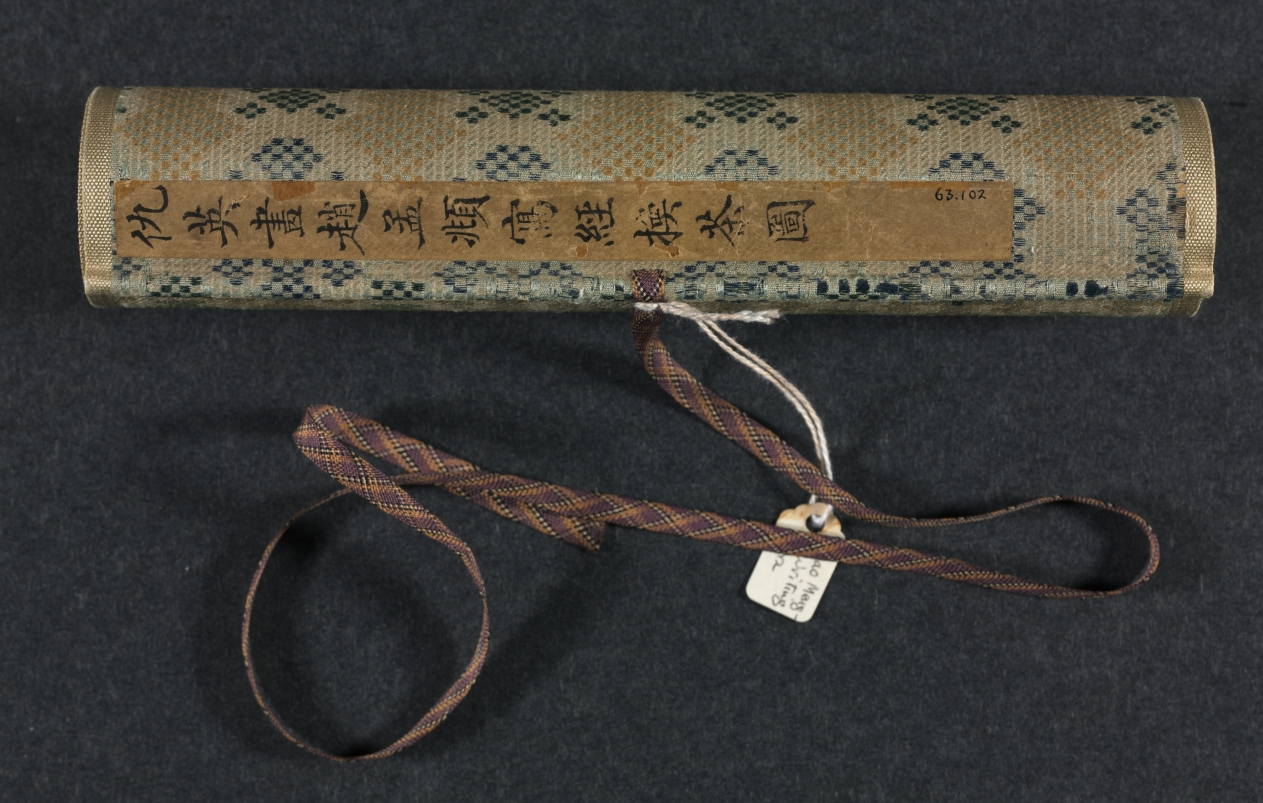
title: Zhao Mengfu Writing the Heart (Hridaya) Sutra in Exchange for Tea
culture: China, Ming dynasty (1368–1644)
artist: Qiu Ying (Chinese, 1494–1552)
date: 1542–43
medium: handscroll, ink and light color on paper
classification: Painting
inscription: Inscription accompanying text of "Heart" sutra, by Wen Zhengming 文徵明 (1470-1559): Zhengming 徵明, written in a boat at Kunshan 崑山, on the twenty-first day of the ninth month, in the renyin 壬寅 year, the twenty-first year of the Jiajing era [1542].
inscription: Colophon by Wang Shih-mou: Chou Yü-shün [Feng-lai] of K'un-shan was a scholarly, refined connoisseur of antiquities. He had acquired the poem written by Chao Ch'eng-chih [Chao Meng-fu] about the exchage of tea for Chao's calligraphy of the Prajna sutra. But the sutra itself, also written by Chao Meng-fu, is lost. He therefore asked Ch'iu Shih-fu [Ch'iu Ying] to do a painting and had Wen Cheng-ming, the artist-in-attendance, write the Hridaya Sutra in the "small, regular" style for replacement. Both works are so excellent that even Chao Meng-fu himself would certainly applaud if he should be reborn to see them. I, Shih-mou, had gotten possession of this scroll from the family of Chou Yü-shün, and since it was so wonderfully matched with one of the treasures in my collection. the Hridaya Sutra written by Chao Meng-fu for Priest Li in "running script," like the reuniting of two halves of a jade pi, I completed the scroll with the several colophons written for the "tea-exchange" poem. I did this because the painting of Ch'iu Ying and the calligraphy of Wen Cheng-ming are definitely masterpieces by themselves with absolutely no need to depend on any of the colophons written for the Chao Meng-fu poem. Furthermore, the two sons of Wen Cheng-ming, Shou-ch'eng [Wen P'eng] and Hsiu-ch'eng [Wen Chia]. have each written a colophon explaining the reason for replacing the calligraphy. As their writings are both acceptable for high standard, I didn't want to throw them away. [So by separating these into two scrolls] I was able to get two complete works of art in one clever stroke. I was quite pleased with myself, and hope that those who see this scroll shall not get suspicious because of the missing colophons. Wang Shih-mou wrote in his Jih-sun-chai study, on the first day of the tenth month, in the chia-shen year of the Wan-li era [1584].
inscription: Colophon by Wen P'eng: I-shao [Wang Hsi-chi] wrote in exchange for a flock of geese. Su Tung-po wrote in exchange for meat. Both episodes have become legends of a thousand years. Sung-hsüeh [Chao Meng-fu] "teased" Priest Kung for tea, and the story was immediately immortalized in the poems by all the famous scholars of the times. Indeed, how could one say his humor and elegance are not equal to the ancient worthies? Unfortunately, the poetry has survived but the writing of the sutra is lost. Yü-shün [Chou Feng-lai] therefore asked my father to make up the writing and so here is the complete work of art. Respectfully inscribed by Wen P'eng in the mid-summer of 1543.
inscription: Colophon by Wen Chia: Sung-hsüeh [Chao Meng-fu], in exchanging tea leaves for his writing of the Prajna, had put himself in the company of Yu-chün [Wang Hsi-chih] who exchanged geese for his writing of the Huang-t'ing sutra [the Yellow Chamber, or the Wai-ching ching, a Taoist text attributed to the Yellow Emperor]. However, was this romantic and cultivated gesture really intended for such small things? Actually, he was only proud that the excellence of his calligraphy had made him worthy to be the successor of the Ch'in Dynasty master. Since, very unfortunately, Chao Meng-fu's writing [of the Prajna] was already lost, my father therefore agreed to replace it, and did the calligraphy in the style of the Yellow Chamber. In addition, Yu-shün [Chou Feng-lai] had asked Mr. Ch'iu Shih-fu [Ch'iu Ying] to do a painting of the sutra writing story in the style of Li Lung-mien at the head of the scroll. Now it would seem the entire episode should go down in history for immortality. Respectfully recorded by Wen Chia, on the eighth day of the eighth month, in the year of k'uei-mao [1543]. trans. WKH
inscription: 4 colophons and 23 seals: 1 colophon, dated 1543, and 2 seals of Wen Peng (1498-1573); 1 colophon, dated 1543, and 2 seals of Wen Chia (1501-1583); 1 colophon, dated 1584, and 3 seals of Wang Shih-mou (1536-1588); 2 seals of Chou Feng-lai (16th c.); 3 seals of Sung Lo (1634-1713); 5 seals of the Ch'ien-lung emperor (r. 1736-95); 1 colophon, dated 1902, and 1 seal of Fei Nien-tz'u (1885-1905); 4 seals of Wan-go H. C. Weng (b. 1918); 1 seal unidentified.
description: The Yuan dynasty calligrapher Zhao Mengfu (1254–1322) is said to have transcribed the Heart Sutra for a certain priest named Li in exchange for tea. Later, during the Ming dynasty, the professional painter Qiu Ying from Suzhou painted this scene for his patron. Here, Zhao Mengfu holds a brush and has a piece of paper laid out before him. On the table is an ink stone, an ink stick, and a small water dropper. Drops of water would dissolve the ink stick into liquid ink when it was ground on the flat square stone.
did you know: Qiu Ying was born to a peasant family, but his natural talent led him to a successful career as a professional painter with wealthy patrons.